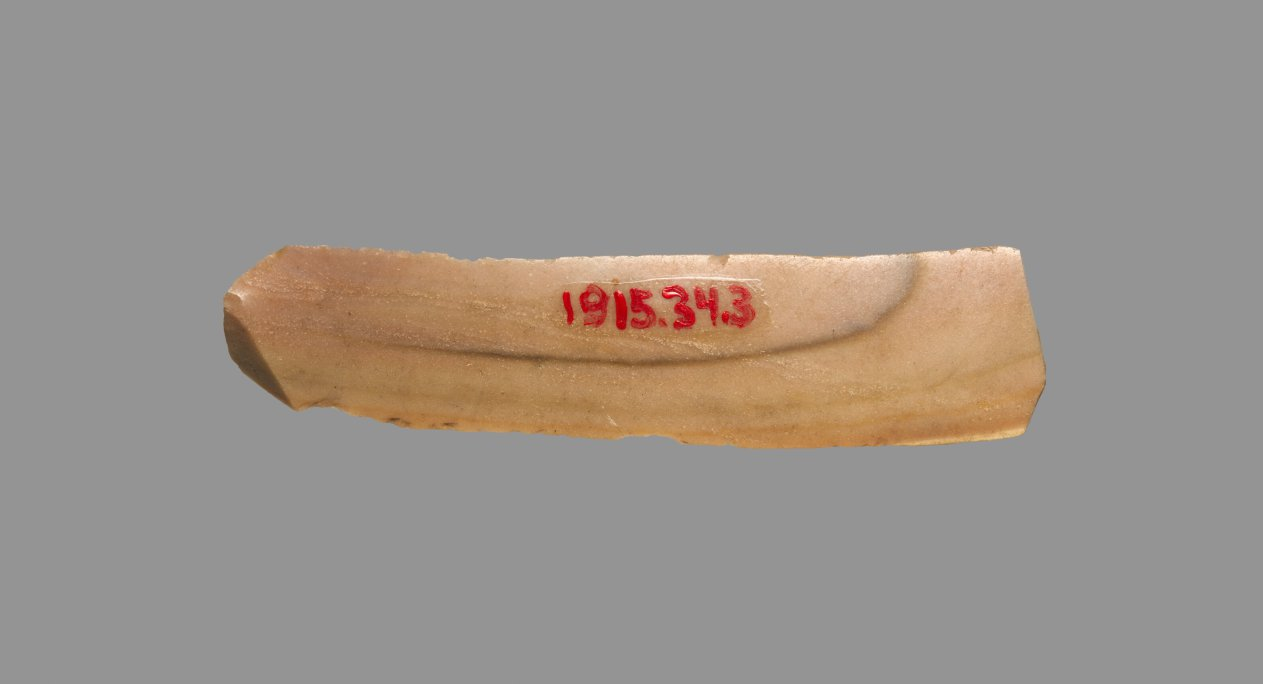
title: Sickle Blade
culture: Egypt, Middle Kingdom (2040–1648 BCE), Dynasty 12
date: 1980–1801 BCE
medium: flint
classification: Implements